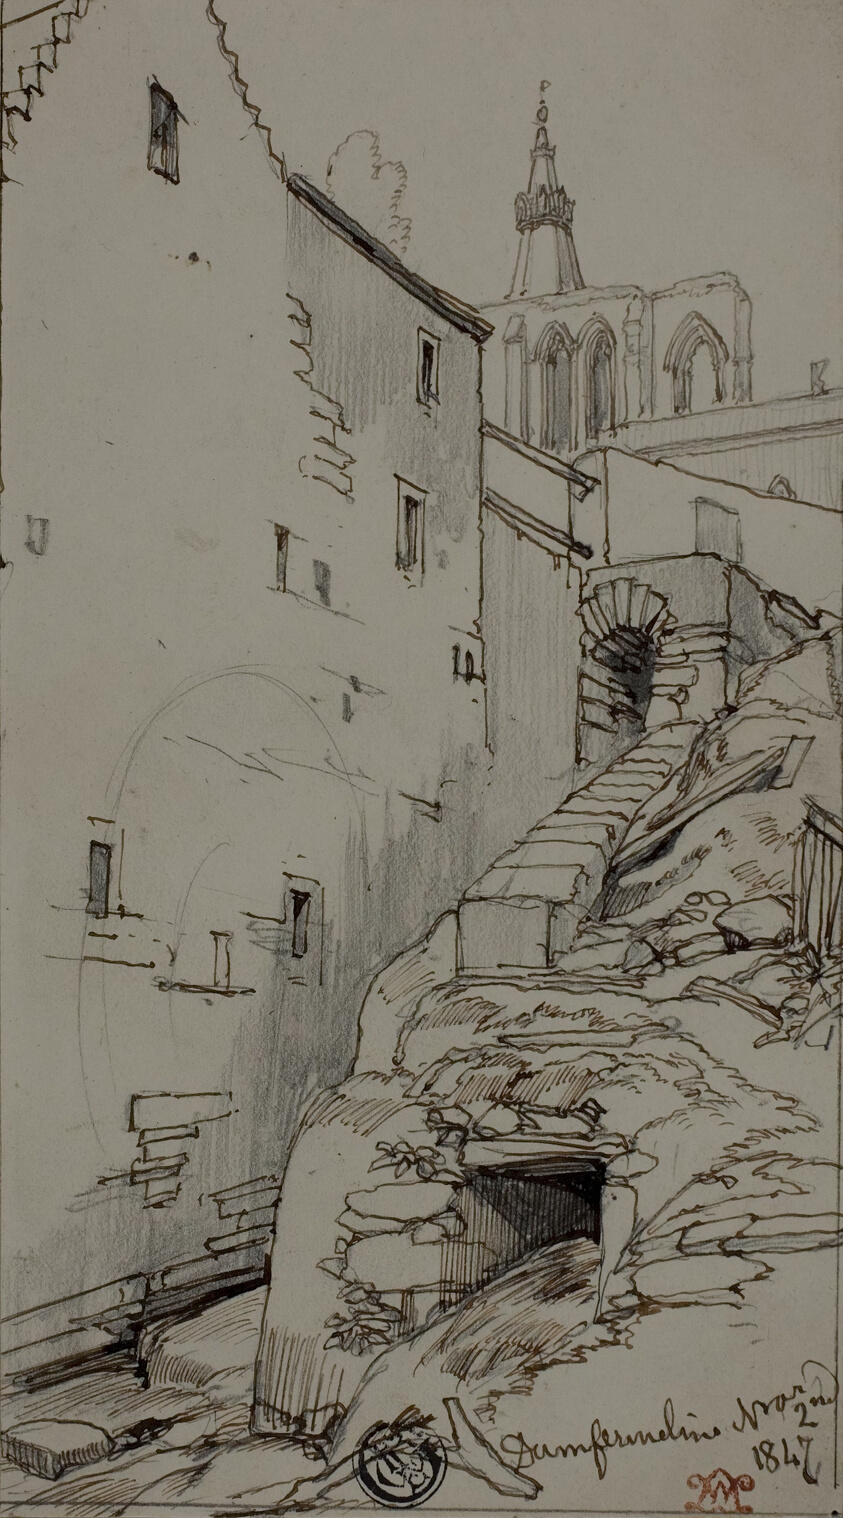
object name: Drawing and Watercolor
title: Dunfermline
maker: William Leighton Leitch (Scottish, 1804-1883)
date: March 2, 1847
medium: Pen and brown ink and graphite on ivory wove paper, laid down on board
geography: Scotland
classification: pen and ink drawings; drawings (visual works); prints and drawing